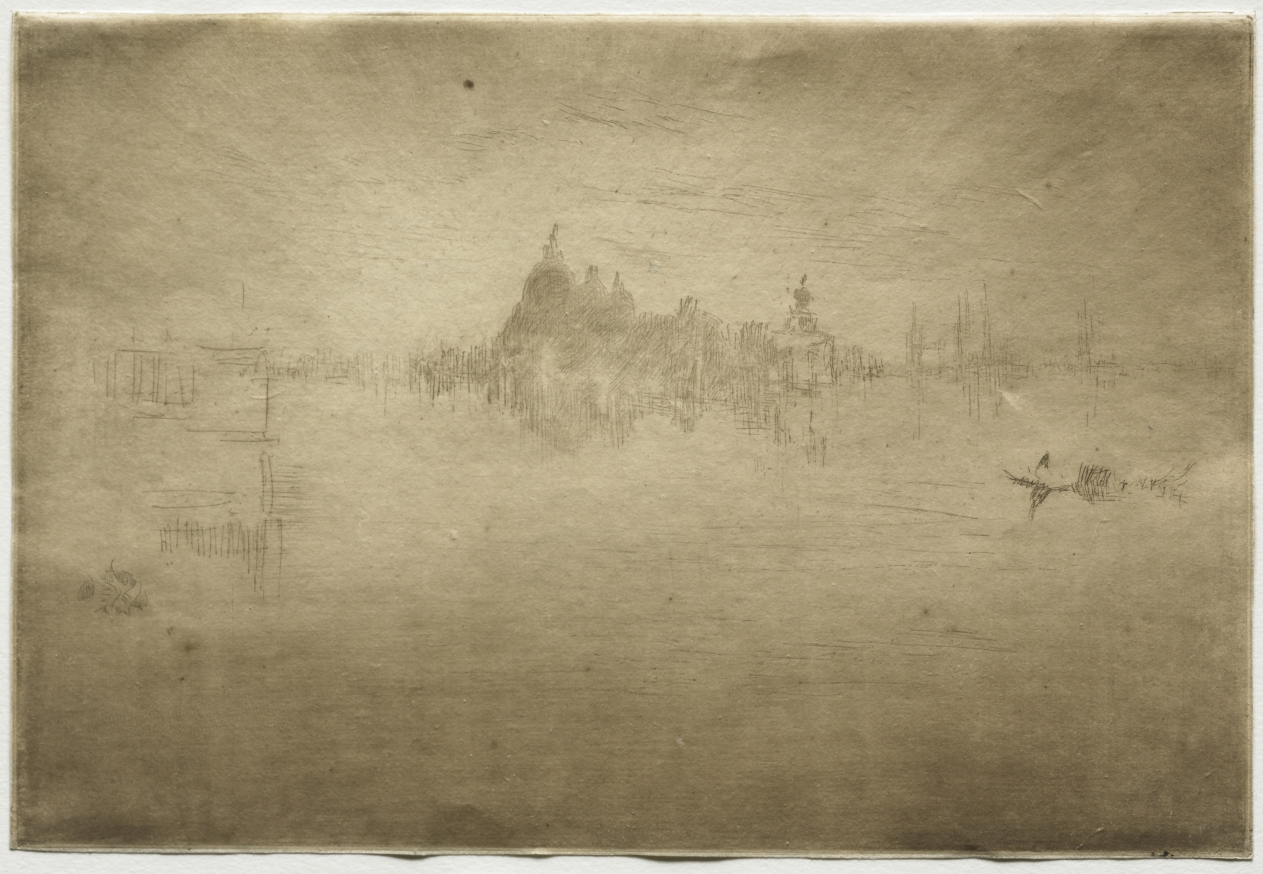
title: Nocturne, Salute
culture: America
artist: James McNeill Whistler (American, 1834–1903)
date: 1879–80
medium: etching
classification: Print